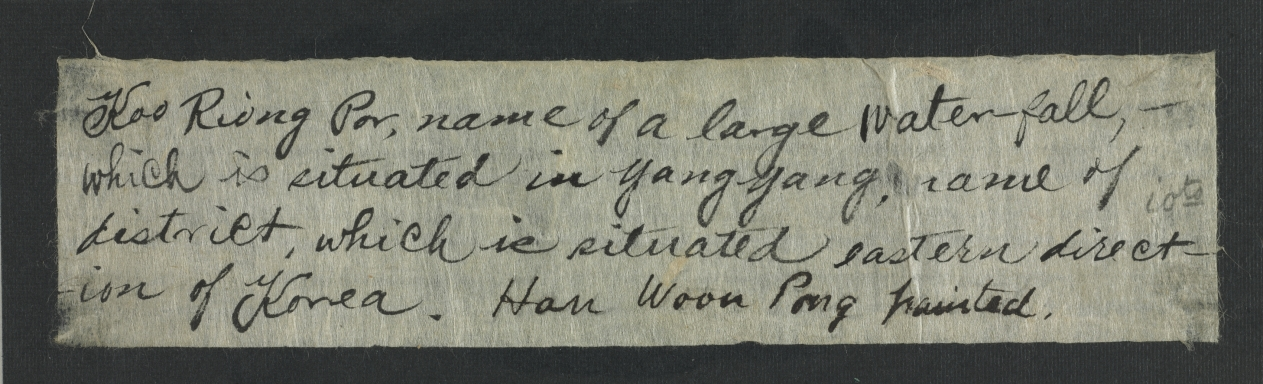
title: Nine-Dragon Falls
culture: Korea, Joseon dynasty (1392–1910)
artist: Han Unpyeong (Korean)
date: late 1800s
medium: ink and color on paper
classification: Painting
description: The Nine-Dragon Falls 구룡포 is one of the popular tourist sites at the Diamond Mountain 금강산 in North Korea. Its V-shaped valley that opens into a rushing white waterfall is its major attraction, allowing visitors to experience the powerful forces of nature. In this painting, two excited scholar tourists accompanied by a Buddhist monk are enjoying both the spectacle and the roar generated by the cascading waterfall.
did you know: The Nine-Dragon Falls, the main subject of this painting, is about 240 feet (74 meters) high.